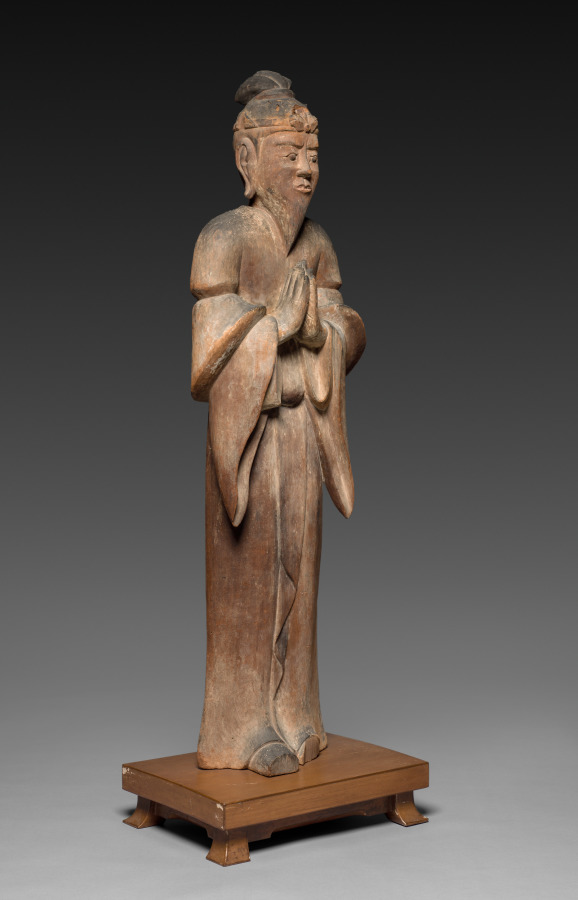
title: Deity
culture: Japan, Heian period (794–1185)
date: 1100s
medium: Magnolia wood with traces of color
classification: Sculpture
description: This unidentified sculpture represents a mature male figure with a long beard. His robes, crown-like head ornament, and hair arranged into a topknot resemble the attire and styling of members of the heavenly realm—tenbu in Japanese—of the Buddhist cosmos. The comparatively simple design, along with carving marks purposely left by the sculptor throughout the surface tend to be associated with sculptures of kami, deities venerated at shrines, or jinja.